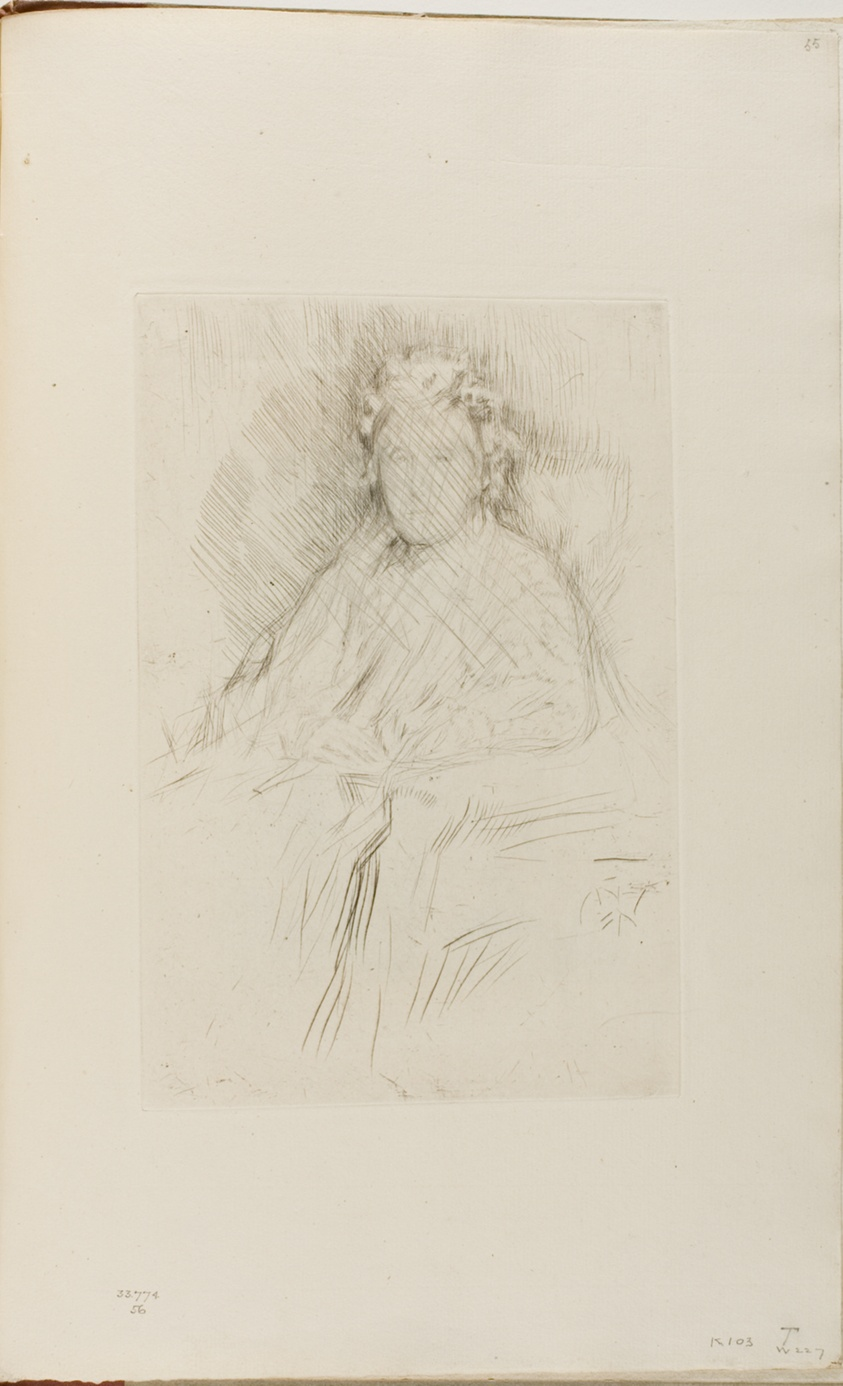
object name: Print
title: Mrs Leyland, Sr.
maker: James McNeill Whistler (American, 1834-1903)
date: 1874/75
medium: Drypoint with foul biting, with scraped and drypoint cancellation, in black ink on ivory laid paper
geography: United States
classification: drypoint; prints and drawing; book; foul biting; print; paper